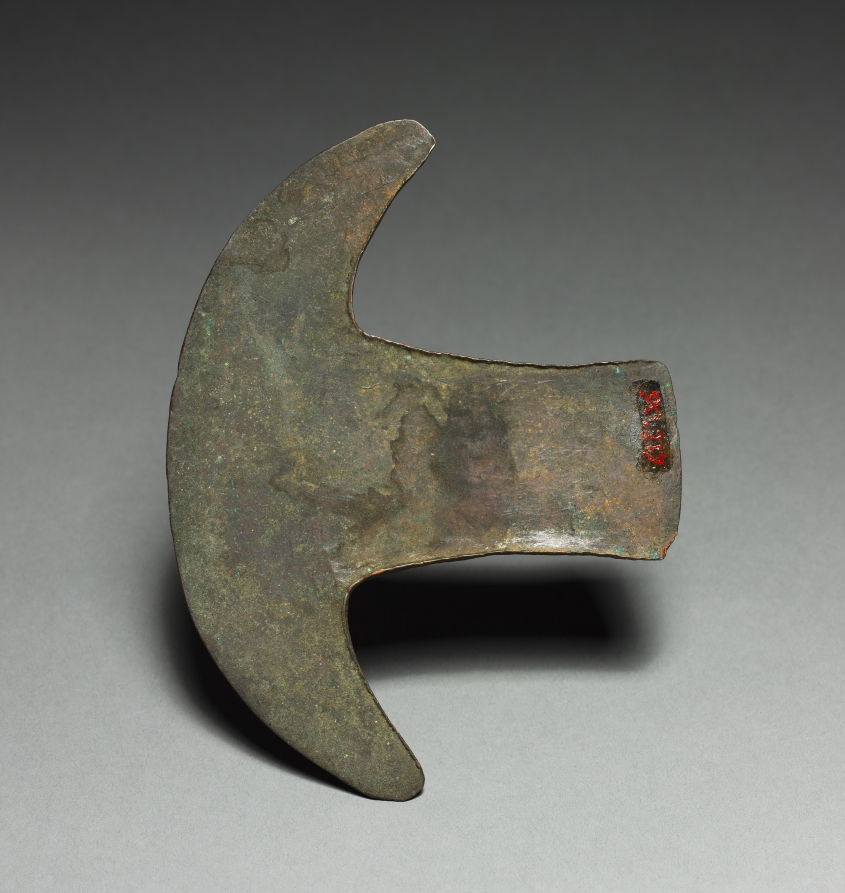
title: Axe-shaped Implement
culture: Mexico, Oaxaca, Mixtec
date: 1200–1519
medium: cast and hammered copper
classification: Metalwork